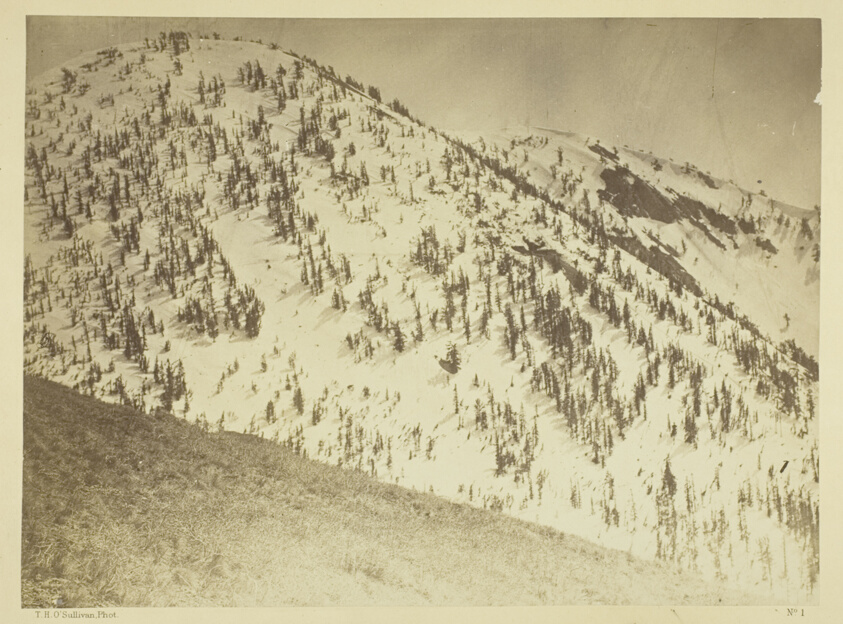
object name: Photograph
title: Snow Peaks, Bull Run Mining District, Nevada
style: 19th century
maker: Timothy O'Sullivan (American, born Ireland, 1840–1882)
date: 1871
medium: Albumen print, from the album "Geographical & Geological Explorations & Surveys West of the 100th Meridian," vol. 1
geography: United States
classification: albumen silver print; photographic process; photography; photograph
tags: Collected by Hugh Edwards